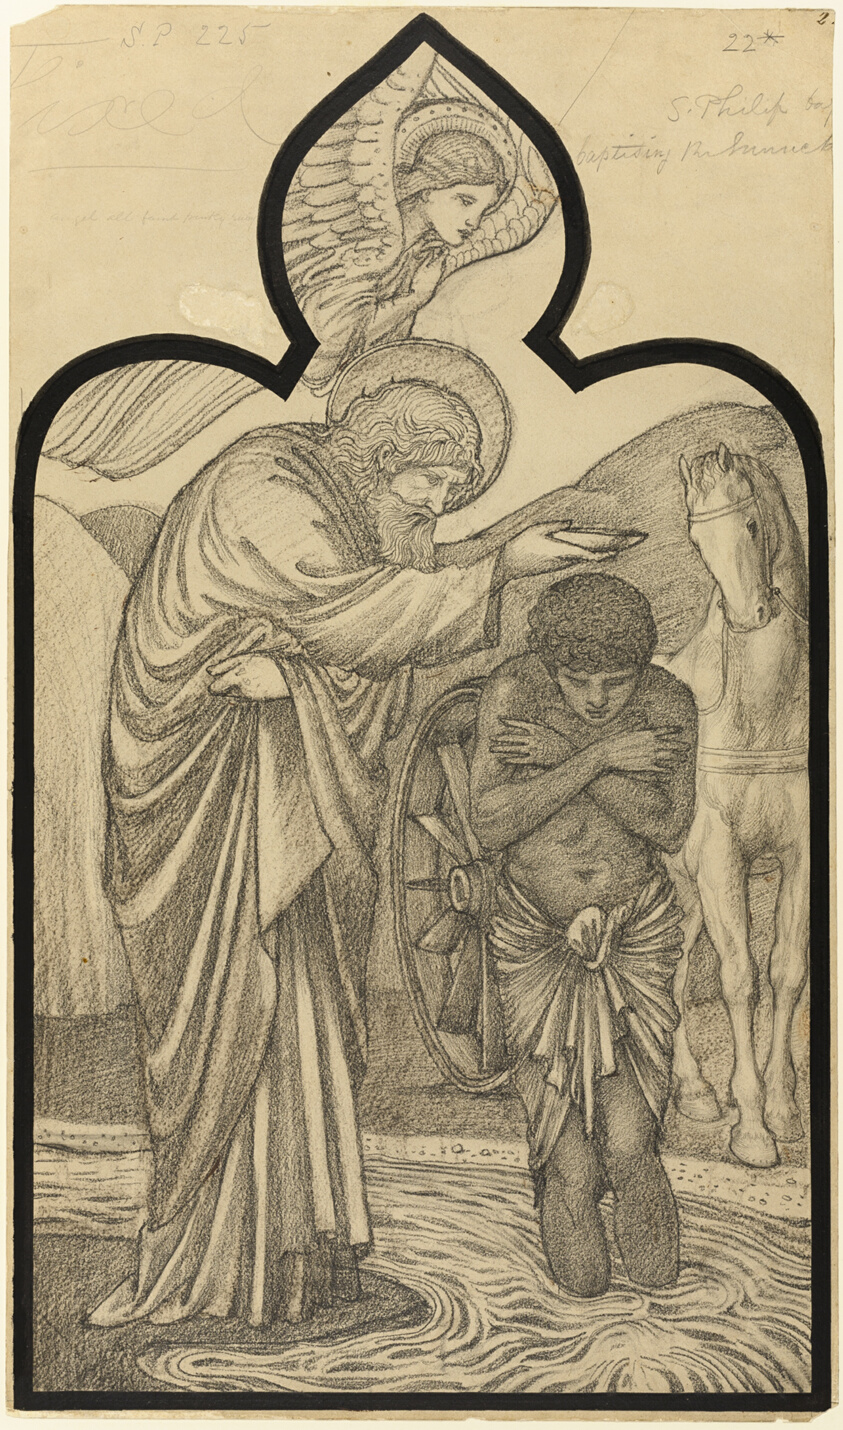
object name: Drawing and Watercolor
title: Saint Philip Baptising the Eunuch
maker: Sir Edward Burne-Jones (English, 1833-1898)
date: 1853/98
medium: Graphite and charcoal, with brush and black ink and traces of brush and brown gouache on cream wove paper, laid down on cream board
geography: England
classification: crayon; drawings (visual works); prints and drawing